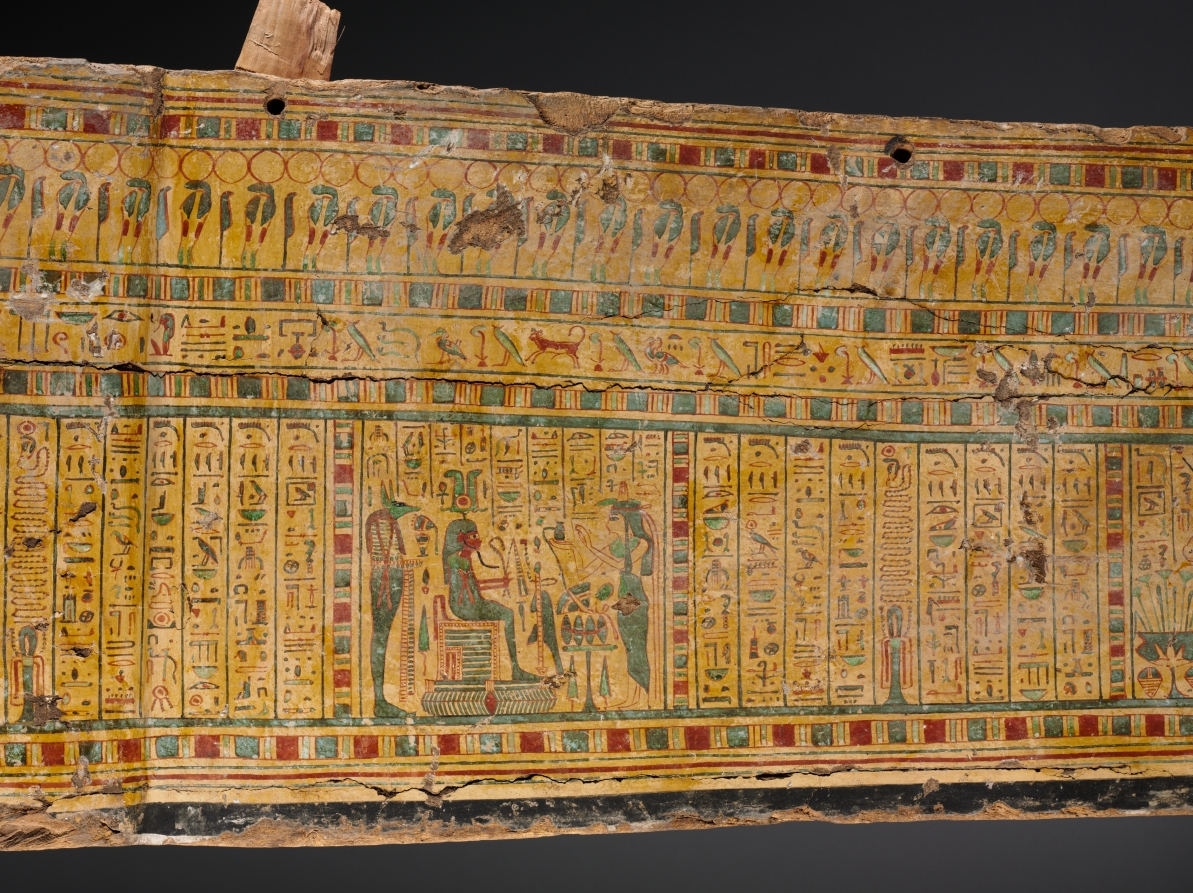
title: Coffin of Nesykhonsu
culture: Egypt, Thebes, Third Intermediate (1069–715 BCE), Dynasties 21–22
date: c. 976–889 BCE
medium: gessoed and painted sycamore fig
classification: Funerary Equipment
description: Egyptian coffins told stories and illustrated spells to help the deceased transition safely to the afterlife. Inside Nesykhonsu's coffin there are two jackals, one facing right and the other left, near the top. Here, the jackal represents the powerful deity Anubis, the god of the afterlife and embalming.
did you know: Two of Nesykhonsu's titles, "Lady of the House" and "Singer of the Choir of Mut the Great," are written on the outside of the coffin.